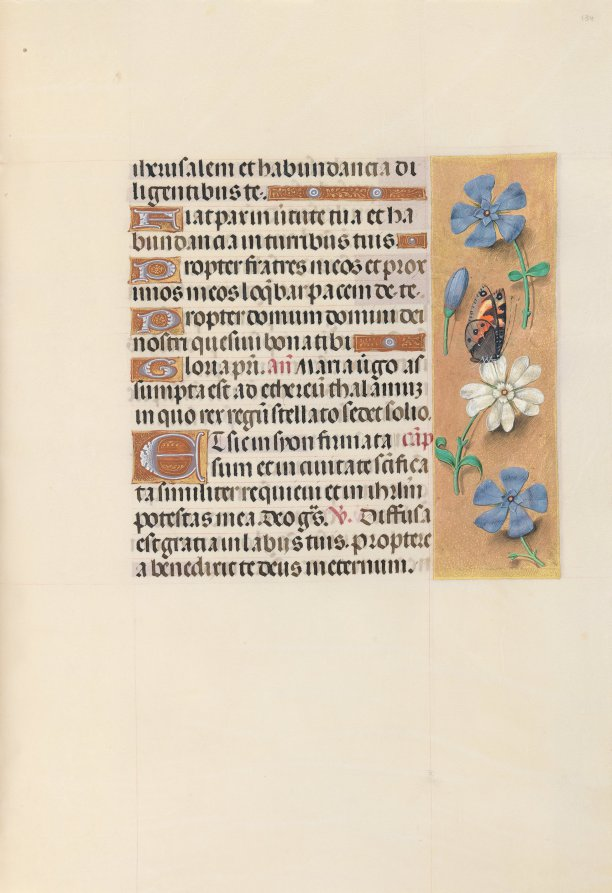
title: Hours of Queen Isabella the Catholic, Queen of Spain: Fol. 134r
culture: Flanders, Ghent and Bruges, late 15th century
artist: Master of the First Prayerbook of Maximillian (Flemish, c. 1444–1519)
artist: and Associates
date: c. 1500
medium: ink, tempera, and gold on vellum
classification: Bound Volume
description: This manuscript was illuminated by a circle of at least five highly organized manuscript painters active in the Flemish cities of Ghent and Bruges. The principal illuminator was Alexander Bening, who painted the majority of the book's miniatures. Manuscripts produced by this circle of artists are renowned for the decoration of their borders, which typically feature a rich variety of realistically-painted flowers, birds, and butterflies. This prayer book, called a book of hours, was intended not for a cleric, but for the private devotions of a lay person-in this case, Isabella the Catholic, Queen of Spain (1451-1504). Isabella's coat of arms embellishes the book's frontispiece. It is unlikely that the book was commissioned by the Queen herself; rather, she probably received it as a diplomatic gift from someone courting her patronage, perhaps Cardinal Francisco Jimenez de Cisneros. A Franciscan friar, Jimenez was dependent upon Isabella for his advancement, first to the post of Queen's confessor in 1492, and then to Archbishop of Toledo in 1495.